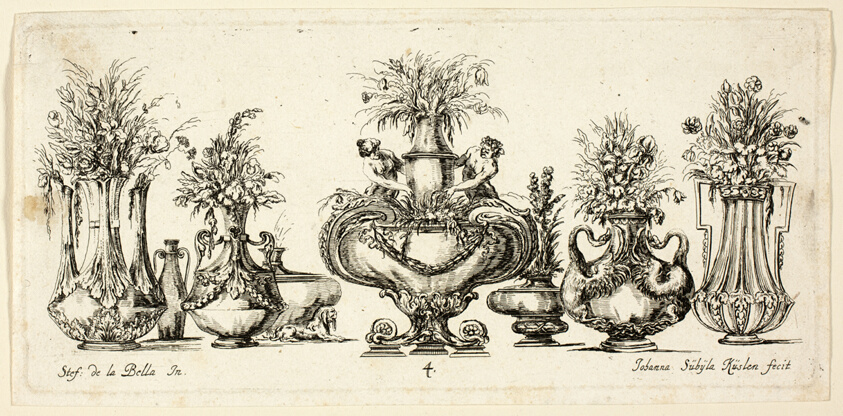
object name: Print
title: Plate Four from Raccolta di Vasi diversi di Stef. de la Bella Fiorentino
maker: Johanna Sibylla Küsel (German, active late 17th-early 18th century); after Stefano della Bella (Italian, 1610-1664)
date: 1646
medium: Etching on paper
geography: Germany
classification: etching; print; prints and drawing